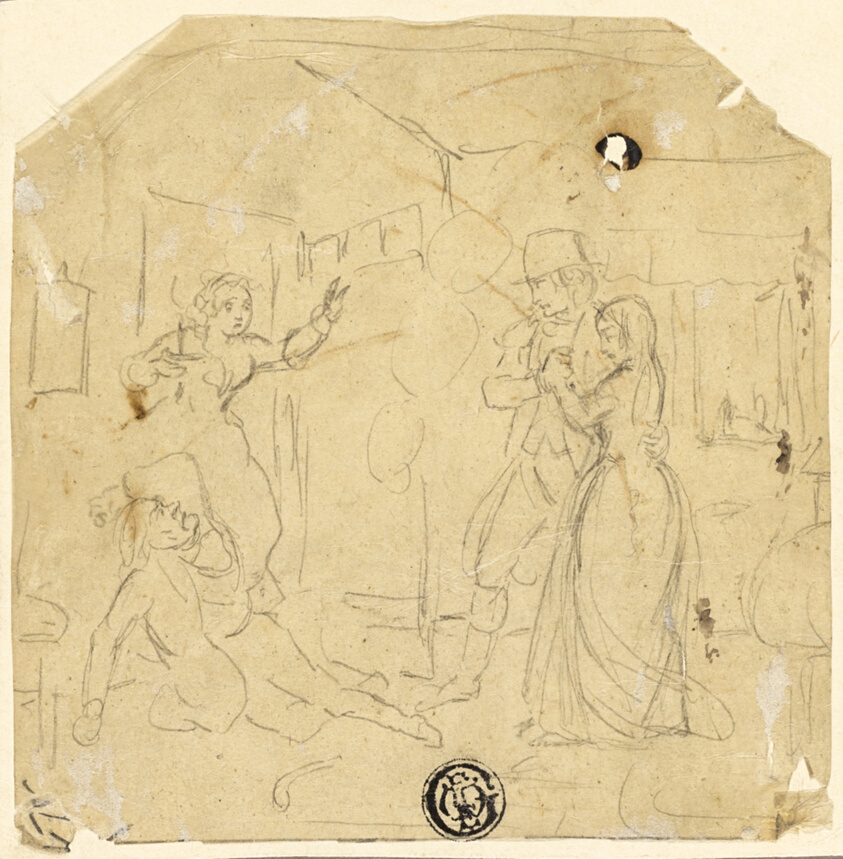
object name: Drawing and Watercolor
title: Dramatic Scene with Couple, Older Man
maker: Joseph Clayton Bentley (English, 1809-1851); or Charles Bentley (English, 1806-1854)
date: c. 1840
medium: Graphite on cream tracing paper, laid down on cream laid paper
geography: England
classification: graphite; paper; drawings (visual works); prints and drawing